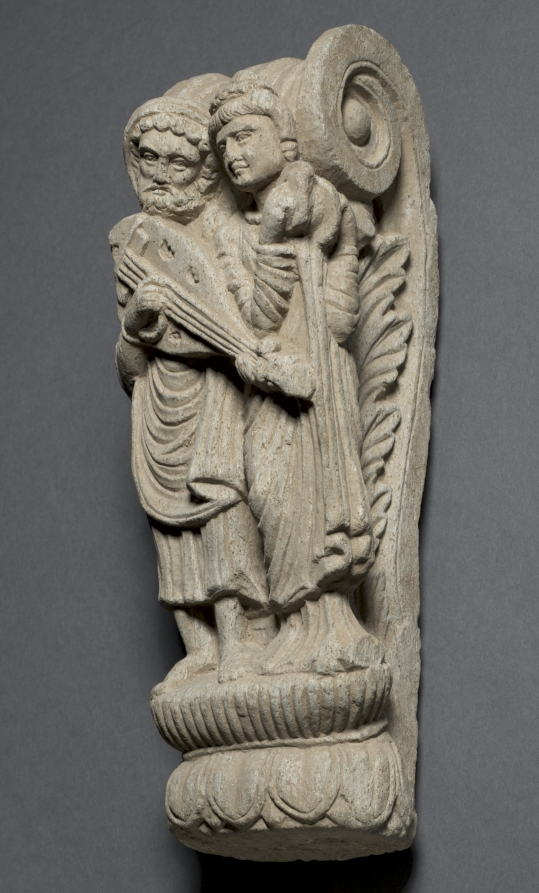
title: Bracket with Two Musicians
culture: Pakistan, Gandhara, probably Butkara in Swat, Kushan period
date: 100s CE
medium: schist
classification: Sculpture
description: This vaulted bracket, with acanthus leaves on the side, is decorated with a musician-couple who stand on a lotus pedestal. Both figures wear heavily draped robes that consist of two garments: an outer one—like the classical Greek himation—and the inner one, ankle length on the male and floor length on the female. The man's head is covered with a cap or a hood, while the young woman wears her hair pulled into a chignon and decorated with a garland. She also wears heavy earrings. The bracket or corbel of this type, originally probably placed fairly high, seems to be a particularly appropriate component for being decorated with celestial, heavenly musicians. The style is quite characteristic for the Swat area, particularly around Butkara, where Domenico Faccenna conducted extensive archaeological excavations. A number of comparable pieces, including voluted brackets, are decorated with acanthus leaves and figures of diverse types, some of which are celestial musicians who hold the same instruments. The facial types represented here are almost identical to some of the figures from Butkara.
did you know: The bearded man plays a lute-like instrument, while his companion holds a clapper-type percussion instrument similar to the kartal still used in parts of India today.